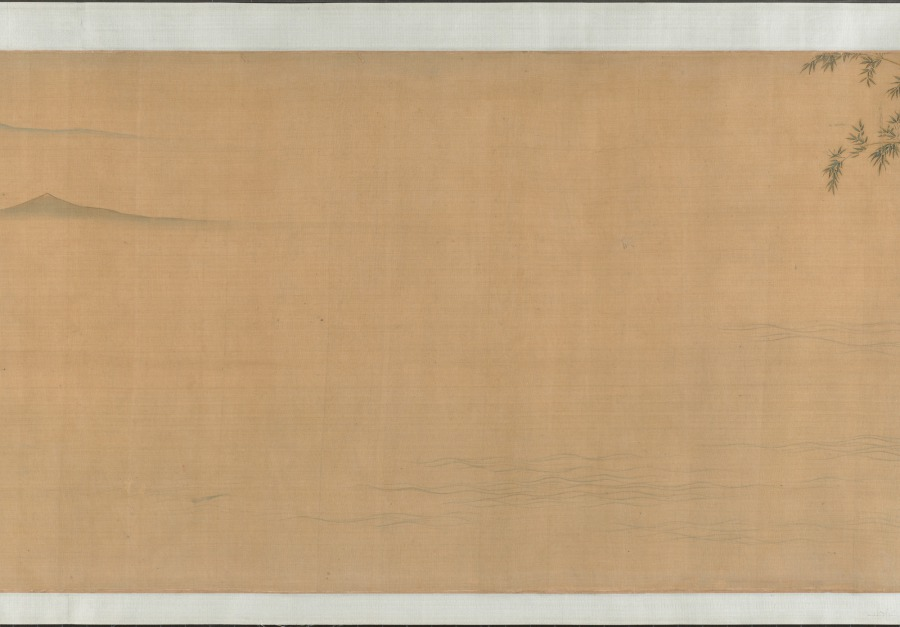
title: Garden for Solitary Enjoyment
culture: China, Ming dynasty (1368–1644)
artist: Qiu Ying (Chinese, 1494–1552)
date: 1515–52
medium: Handscroll; ink and light color on silk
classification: Painting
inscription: Accompanying text of an essay together with seven poems of Sima Guang (1019–1086) and one poem of Su Shi (1037–1101) written by Wen Zhengming (1470–1559) in 1558.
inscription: 2 colophons and 82 seals: 4 seals of Wen Zhengming 文徵明 (1470–1559); 59 seals of Xiang Yuanbian 項元汴 (1525–1590); 1 colophon, dated 1644, and 7 seals of Xiang Yukui 項禹揆 (c. late 1500s–1659); 1 colophon, dated 1880, and 2 seals of Weng Tonghe 翁同龢 (1830–1904); 2 seals of Ch'eng Chen-i (19th c.); 1 seal of Han Ch'ung (19th c.); 4 seals of Wan-go H. C. Weng 翁萬戈 (1918–2020); 3 seals unidentified.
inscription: Colophon by Xiang Yukui 項禹揆 (c. late 1500s–1659): The painting of The Garden for Self-enjoyment on the right by Shih-chou, Mr. Qiu [Qiu Ying] is in the style of Li Lung-mien. Its mood is peaceful, as if meeting the ancient gentlemen face to face among the brushes and silk; it lifts one above the sordid bustle of life. Formerly, my late father handed me this scroll which had only the painting without the written essay. I considered asking a good calligrapher to write the essay to add to it but was afraid that the quality of the writing would not match the painting. Several years later, I saw at a friend's house this essay and poems (of Ssu-ma Kuang] written by Hengshan [Wen Zhengming], once owned by my grandfather; so I spared no expense to obtain it. I rejoiced at this and said: "The divine swords are finally united. How things are pre-destined!" Now my friend Chang Kung-chao's technique for mounting [painting and calligraphy] is excellent. Therefore by daring to take them out and join them together, I can preserve this beautiful story of singular reunion. Xiang Yukui recorded at Hai-yeh-t'ang [hall] two days before New Year's Eve in the jiasheng year of the Chongzhen era [1644]. trans. LYSL/HK/WKH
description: Garden of Solitary Enjoyment refers to a site built in 1073 by the statesman Sima Guang (1019–1086) after he had retired to Luoyang, Henan province. Every spring, visitors would flock to his garden. Each of its seven structures references a historic figure. Sima wrote: I channel streams [like Du Mu], to water flowers [like Bai Juyi], or trim bamboo [like Wang Huizhi]. . . . I know of no joy between heaven and earth that could take its place. Qiu Ying’s painting, created after an 11th-century version of the same theme, must have appealed to garden owners of the Ming dynasty, since it became the template for numerous Suzhou workshop copies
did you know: Sima Guang completed his monumental survey of Chinese history, Zizhi tongjian, in the garden depicted in this painting.